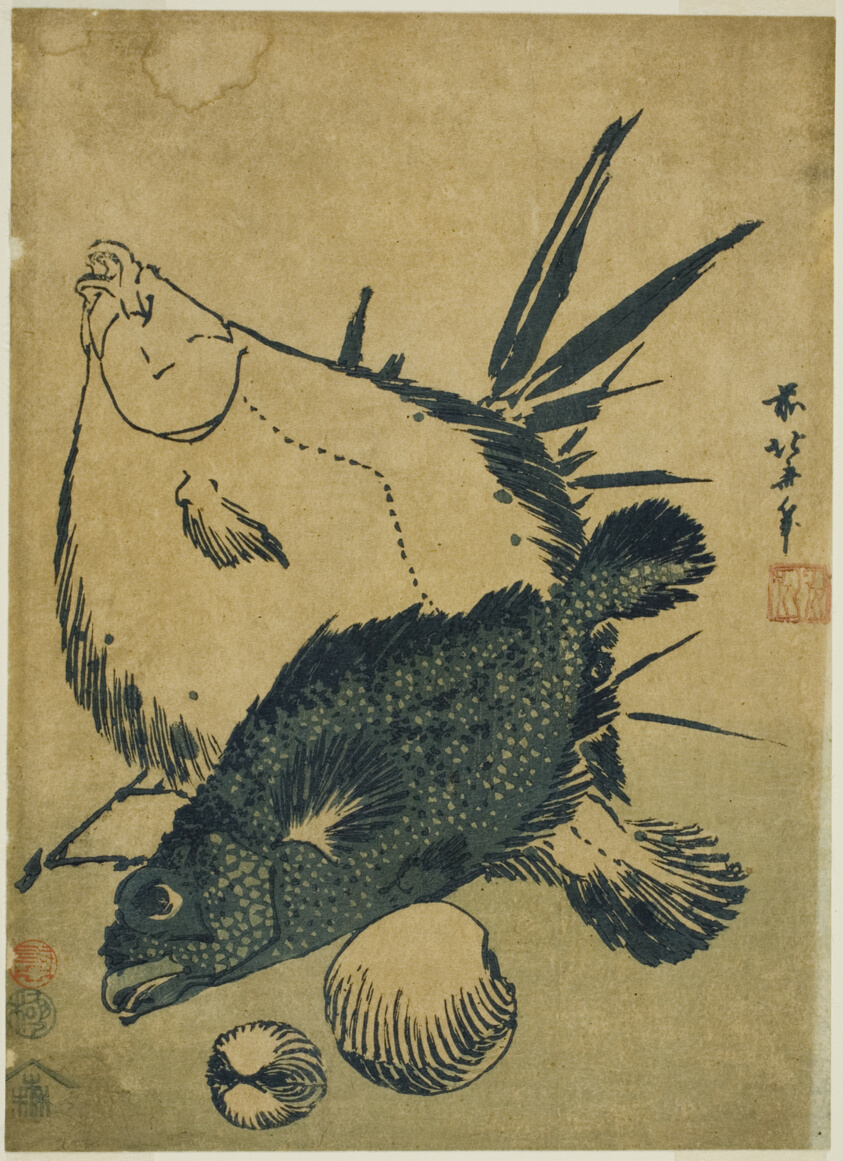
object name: Print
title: Flatfish, scorpion fish, and shells, from an untitled series of chuban prints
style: Japanese (culture or style)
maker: Katsushika Hokusai 葛飾 北斎; Japanese, 1760-1849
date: c. 1831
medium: Color woodblock print; chuban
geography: Japan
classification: woodblock print; print; asian art